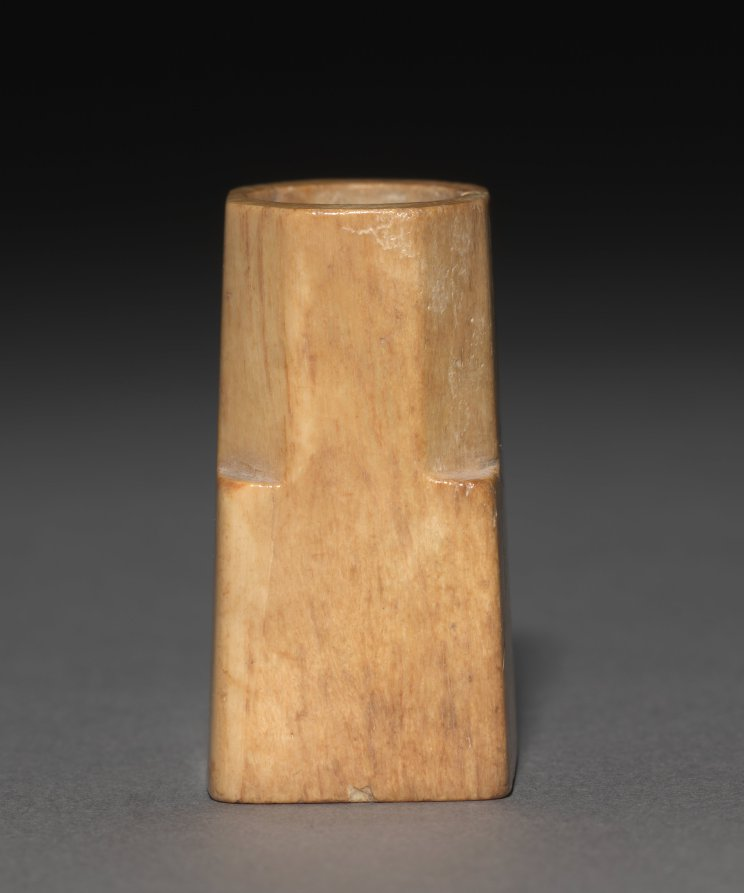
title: Carved Bone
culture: Parthian Empire (247 BCE–224 CE)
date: 1–200 CE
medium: carved bone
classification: Miscellaneous